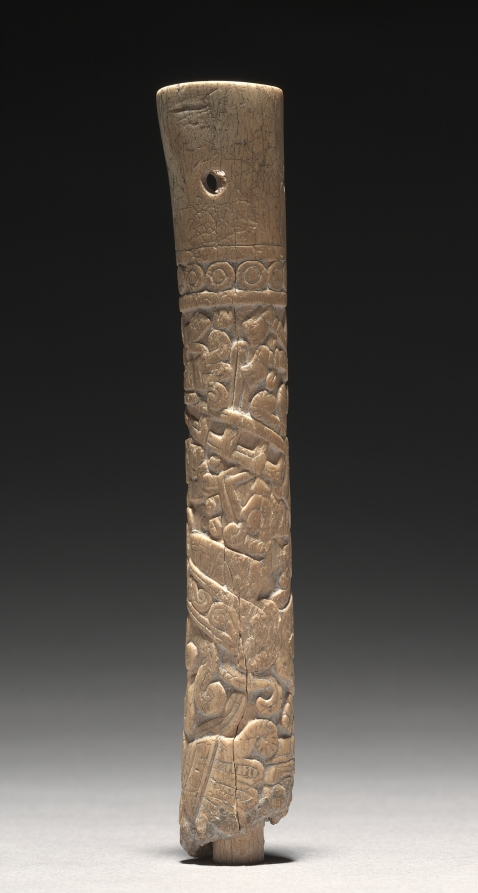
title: Carved Tube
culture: Mexico, Oaxaca, Mixtec, 13th-16th century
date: c. 1200–1519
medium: bone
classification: Jewelry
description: Carved in spiral registers, the ornamentation on this bone tube resembles Mixtec painting, both in codices (screenfold books) and architectural murals.